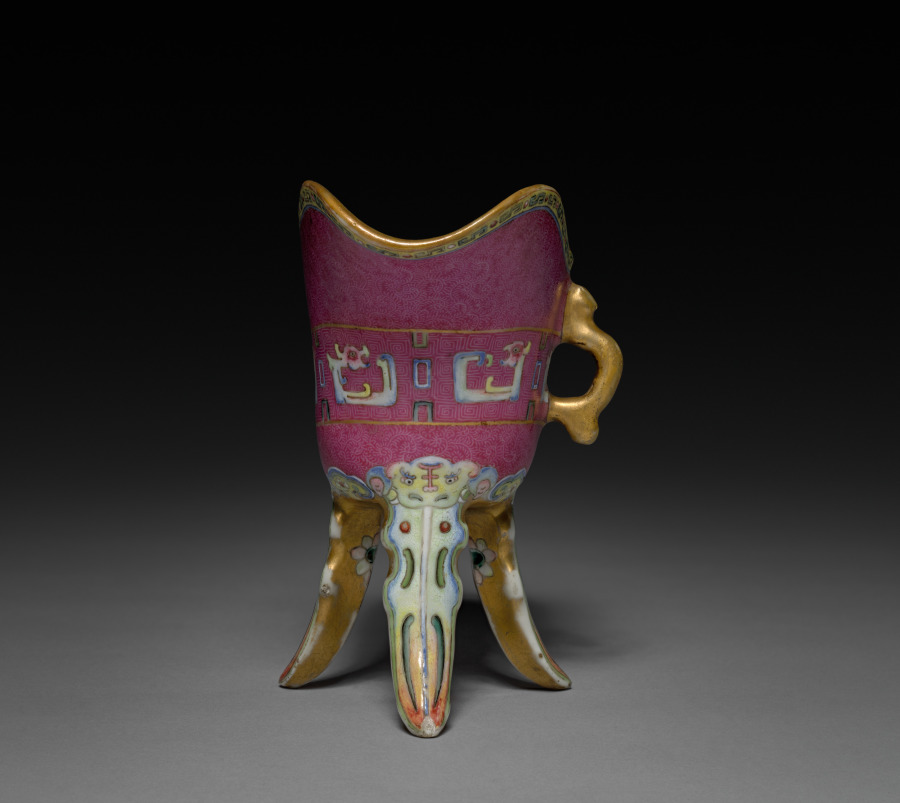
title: Libation Cup of Bronze Format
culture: China, Qing dynasty (1644-1911)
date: 1800s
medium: porcelain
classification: Ceramic